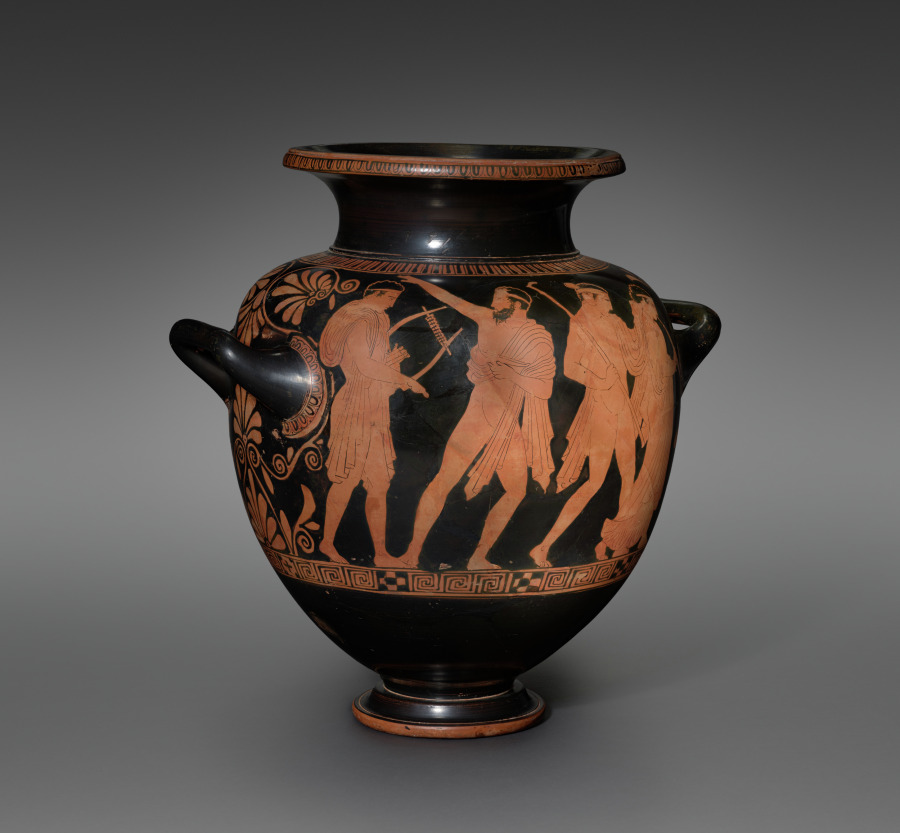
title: Red-Figure Stamnos (Mixing/Storage Vessel): Komos (Musicians and Revelers)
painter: attributed to Kleophon Painter (Greek, Attic, active c. 440–410 BCE)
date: c. 435–425 BCE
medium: Ceramic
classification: Ceramic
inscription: Κ Α Λ Ο Σ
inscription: Κ Α Λ Ο [Σ]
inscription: black '080'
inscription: black 'WF2'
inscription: black '0.19'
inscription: red '09.6'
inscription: partially removed red and white sticker, with number blacked out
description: Four lively figures move to the right across the front side of this stamnos, a vase used for storing and mixing wine. First comes a finely dressed woman playing the pipes, followed by three male figures, all nearly nude. The bearded one holds a drinking cup and reaches back, perhaps dancing, while the last in line concentrates on the music of his lyre.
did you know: The Athenian stamnos, a shape favored by the Etruscans, was made primarily for export.